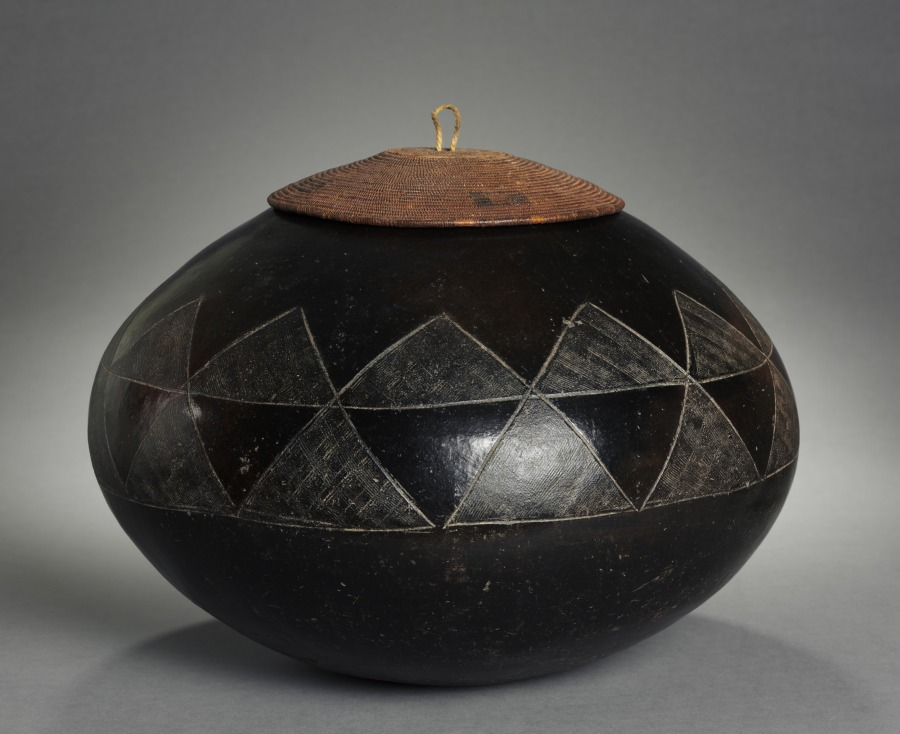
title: Lidded Pot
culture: Southern Africa, South Africa, Zulu, mid-20th century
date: 1900s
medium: Terracotta and plant fiber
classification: Vessels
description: This large, beautifully shaped vessel was used for the serving of beer, an essential component of Zulu hospitality. Undecorated vessels were for private household use, and ornamented examples were reserved for guests. Zulu pottery is produced by women, and is typically thin-walled, with a burnished black surface. Decoration may be incised around the shoulder, as in this example, or may consist of raised bumps that resemble body scarification. The basketry lid protects the vessel's contents from flies or debris; contemporary pot lids are often woven of telephone wire with a colorful plastic coating